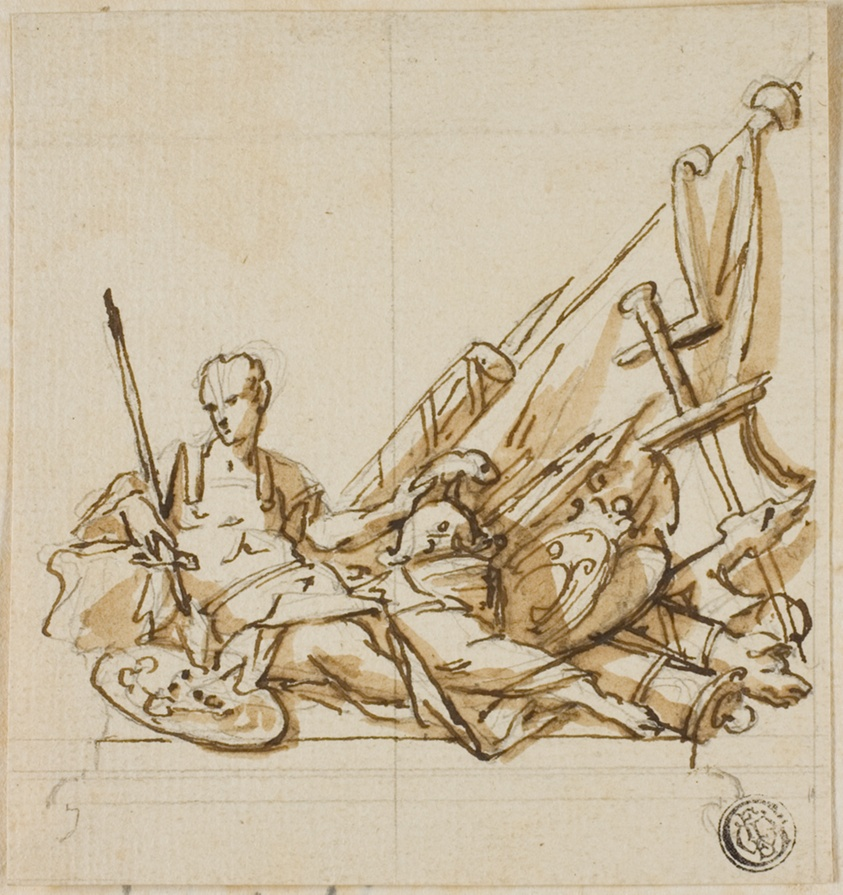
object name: Drawing and Watercolor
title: Warrior upon Sarcophagus Accompanied by Trophies: Unexecuted Design for the Monument to the First Duke of Marlborough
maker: John Michael Rysbrack (Flemish, 1693-1770)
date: c. 1733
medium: Pen and brown ink, with brush and brown wash, over graphite, on ivory laid paper, tipped onto ivory laid paper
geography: Flanders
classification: pen and ink drawings; drawings (visual works); prints and drawing